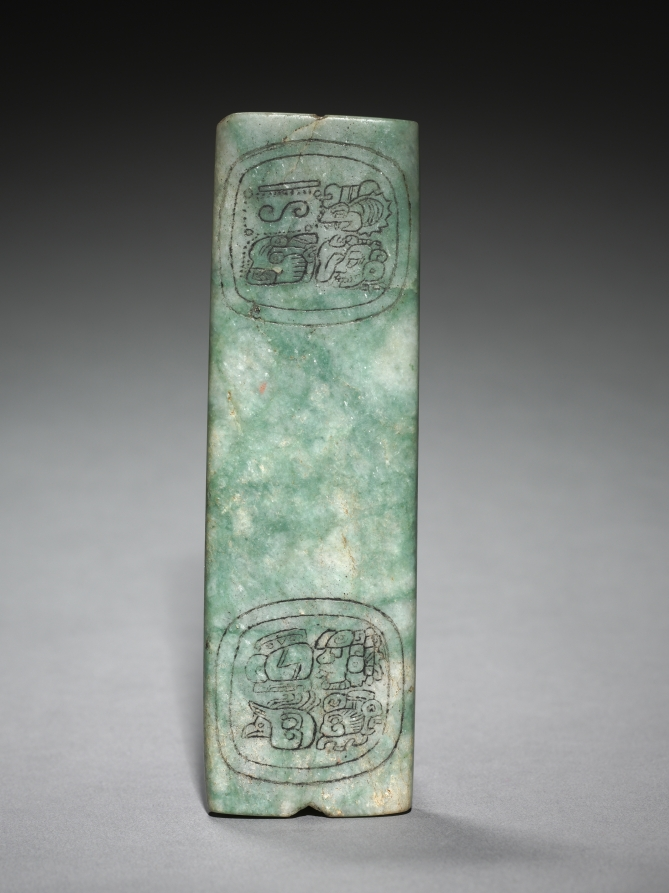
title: Bar Bead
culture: Mexico or Central America, Maya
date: 250–550 CE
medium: jadeite-albitite, modern black pigment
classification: Jade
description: Greenstone ornaments were part of Maya nobles’ regalia. The hieroglyphs of the bead, which hung horizontally, refer to two Maya rulers.